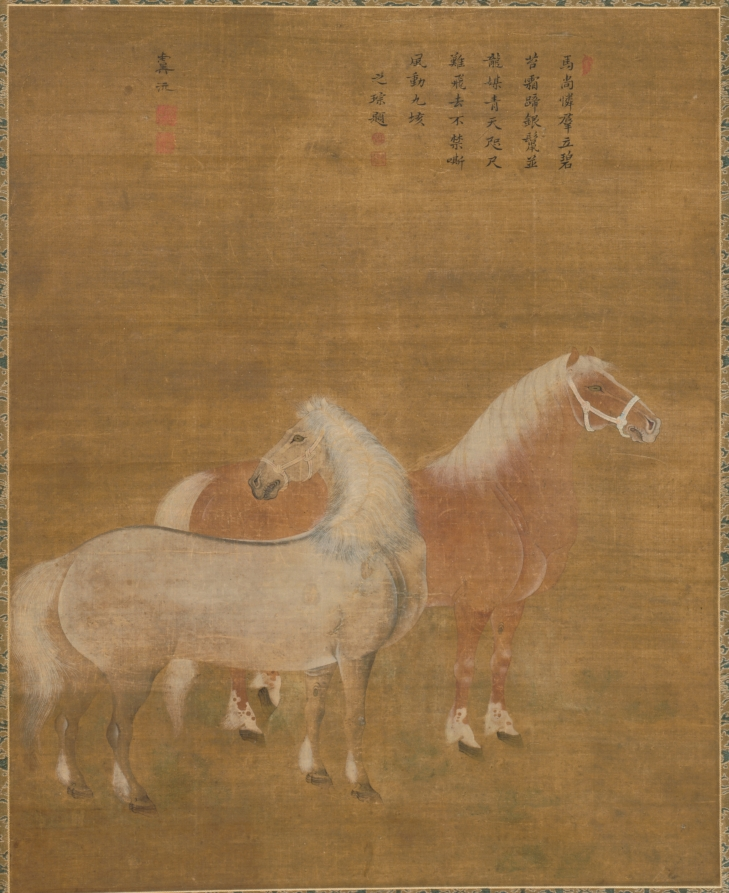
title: Two Horses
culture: China, Qing dynasty (1644-1911)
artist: attributed to Yu Yuan (Chinese, active 1700s)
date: 1644–1911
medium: Hanging scroll; ink and color on silk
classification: Painting